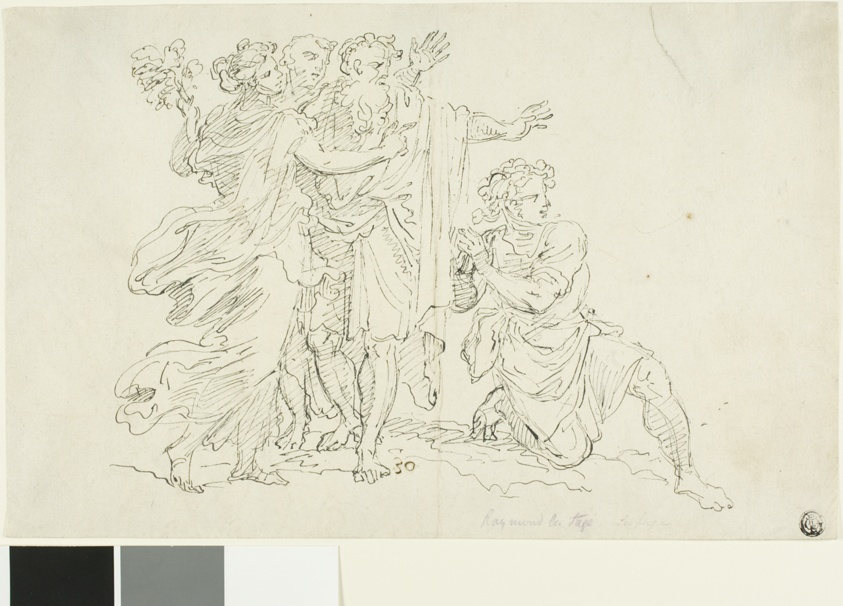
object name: Drawing and Watercolor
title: Four Classical Figures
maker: Francois Roettiers (French, 1685-1742); or Raymond de Lafage (French, 1656-1690)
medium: Pen with black and brown ink on ivory laid paper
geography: France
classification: pen and ink drawings; paper; drawings (visual works); prints and drawing